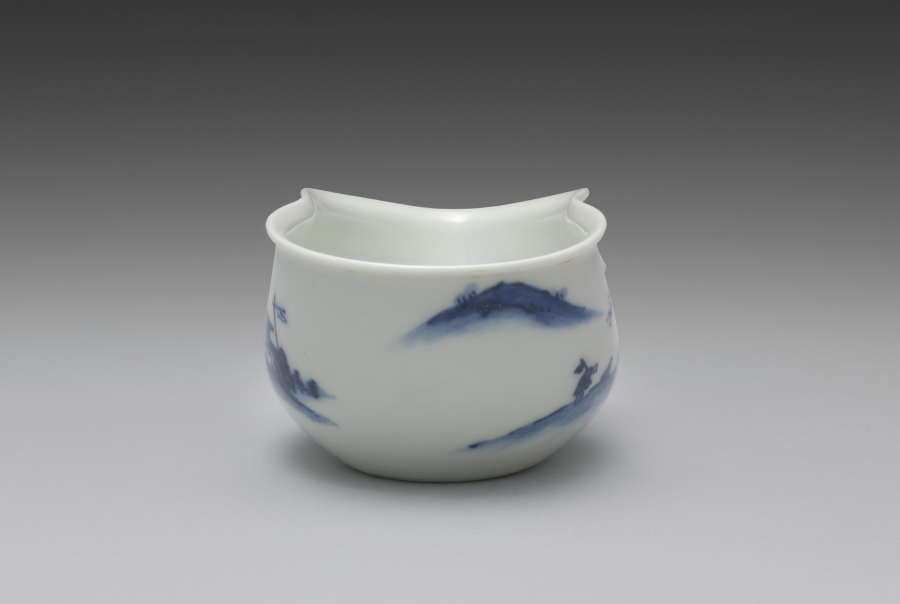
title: Water Cooler from Tea Set with Chinese Landscape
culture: Japan, Meiji period (1868–1912)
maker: Seifū Yohei III (Japanese, 1851–1914)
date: 1893–1914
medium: Porcelain with underglaze blue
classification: Ceramic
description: The kidney-shaped water cooler, yuzamashi, has a scene of a man gazing at a full moon in a dramatic mountain-scape stretching before a large compound in the woods. Another man, hunched over and carrying a heavy parcel tied to a pole over his shoulder, struggles to make his way up a hill to the site. The cooler also has a pair of applied nyoi staff-head forms for resting the tips of one’s thumb and index finger.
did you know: This is a yuzamashi, a container used to cool boiled water to just the right temperature for the best flavor when steeping.